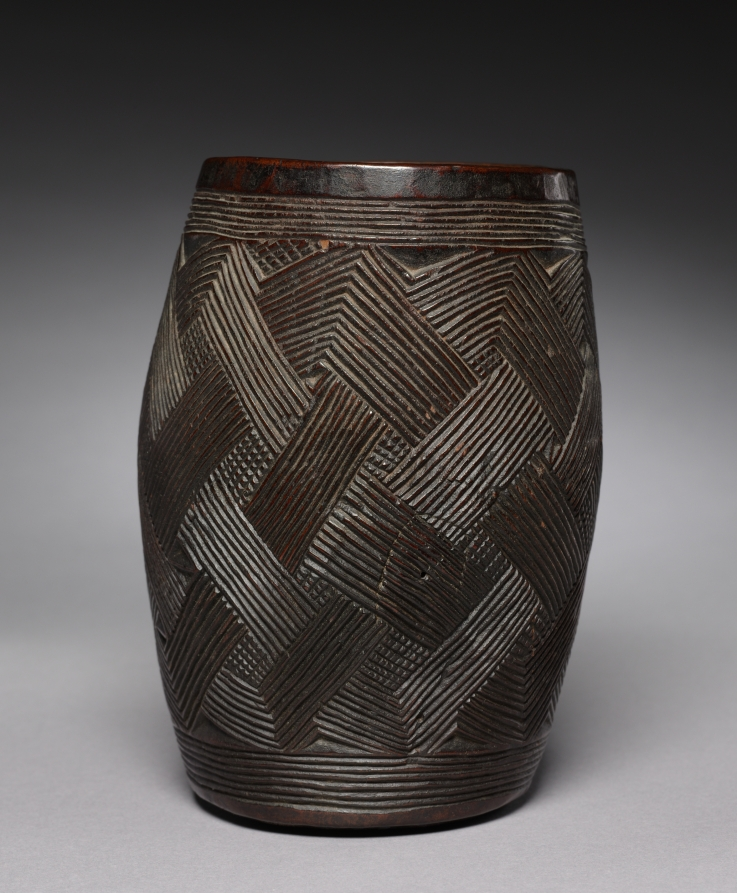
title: Cup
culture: Democratic Republic of the Congo, Kuba, 20th century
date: 1900s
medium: Wood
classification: Vessels